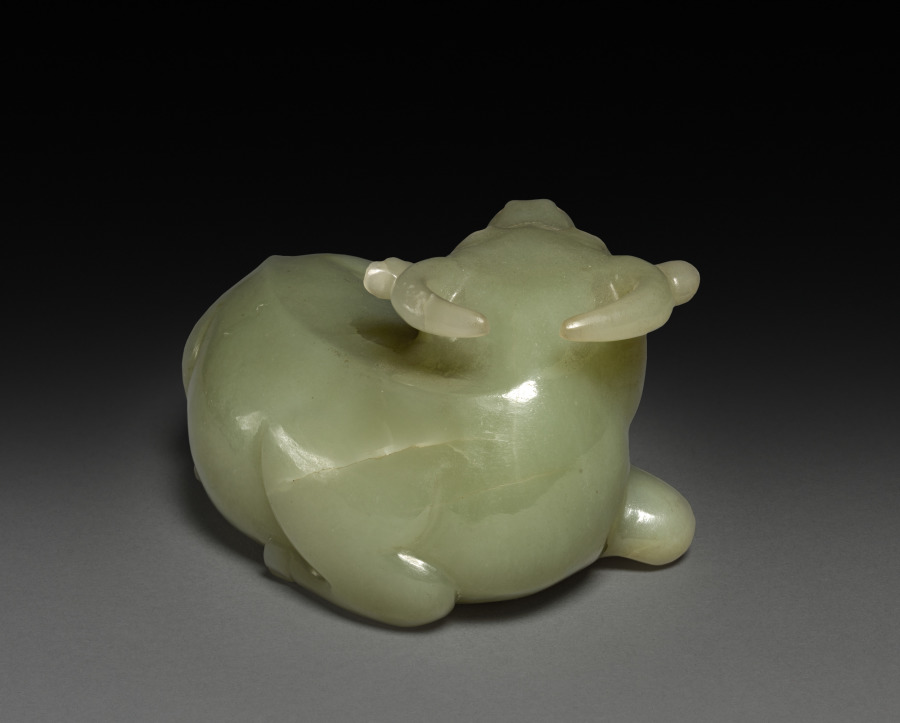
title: Reclining Water Buffalo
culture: China, Qing Dynasty (1644-1911), Kangxi reign (1642-1722)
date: 1642–1722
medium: Jade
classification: Jade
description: In the Ming (1368–1644) and Qing (1644–1911) dynasties, luxury items became more affordable to larger parts of the society, including women, merchants, and literati in non-official positions. Imperial patronage and a growing urban population encouraged consumption of luxury goods and local craftmanship. This jade buffalo illustrates the superb carving skills and the creative mind of its accomplished creator, who sought clients on a competitive market.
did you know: This jade buffalo may have been used as a paperweight on a scholar's desk.